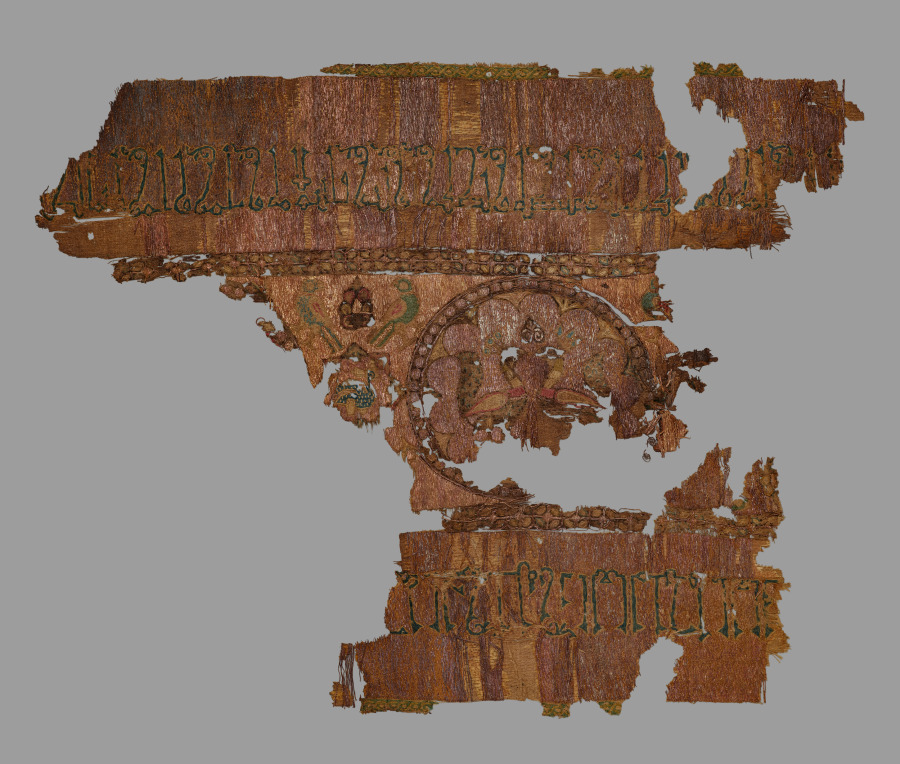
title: Fragment with peacocks and inscription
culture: Iraq, probably Baghdad, Seljuq period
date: 1000–1100s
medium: Silk warp and cotton weft (mulham): plain weave; silk, gilt, and silver thread: embroidery, couched and split stitches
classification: Embroidery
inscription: [bottom]: ". . . [the Compassiona]te [?]. Praise be to God, Lord of the worlds and the wor[lds?]." [top]: ". . . command and glory and power and good fortune and . . . peace and command and command [one word garbled]."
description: One of the stories in "The Thousand and One Nights" is of a slave girl named Zumurud who lived in Khurasan and embroidered curtains with designs of animals and birds in colored silk and gold threads. Sumptuous embroideries were not only commissioned by rulers, caliphs, and court officials but also widely exported. Today, less than a dozen fragments of these rich embroideries survive. All are worked on "mulham," a fabric having silk warps and cotton wefts that was a specialty of Iran and Iraq. With the exception of the Cleveland Museum of Art's fragment CMA 1952.257, which was found in Baghdad, all of the known examples were preserved until the 1900s in Egyptian graves and refuse heaps.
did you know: The design is arranged in three broad bands; the top and bottom have two opposing lines of Kufic inscription and the center has roundels.